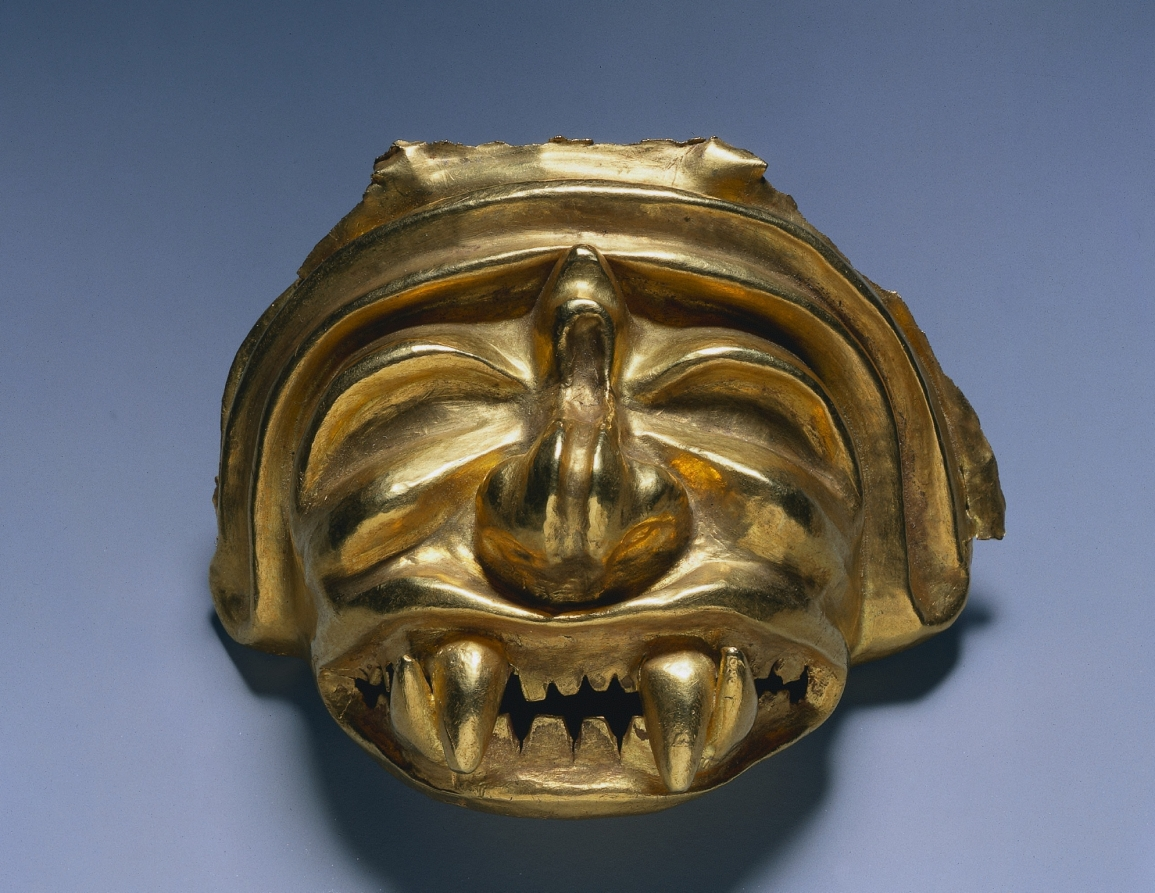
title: Mask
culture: Peru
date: 200–1000 CE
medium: gold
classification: Metalwork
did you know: Fangs were a marker of supernatural power for many ancient Andean societies.